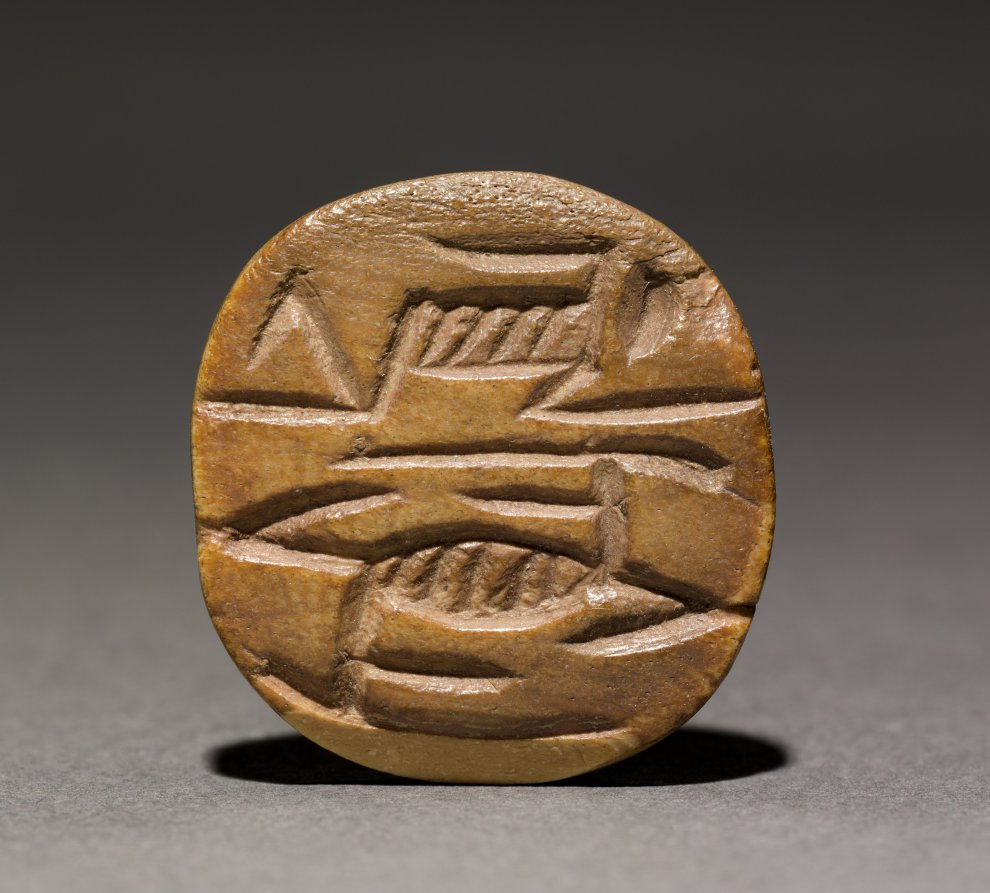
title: Seal Amulet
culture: Egypt, Old Kingdom (2647–2124 BCE), Dynasties 5–6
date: 2300–2124 BCE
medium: bone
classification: Amulets